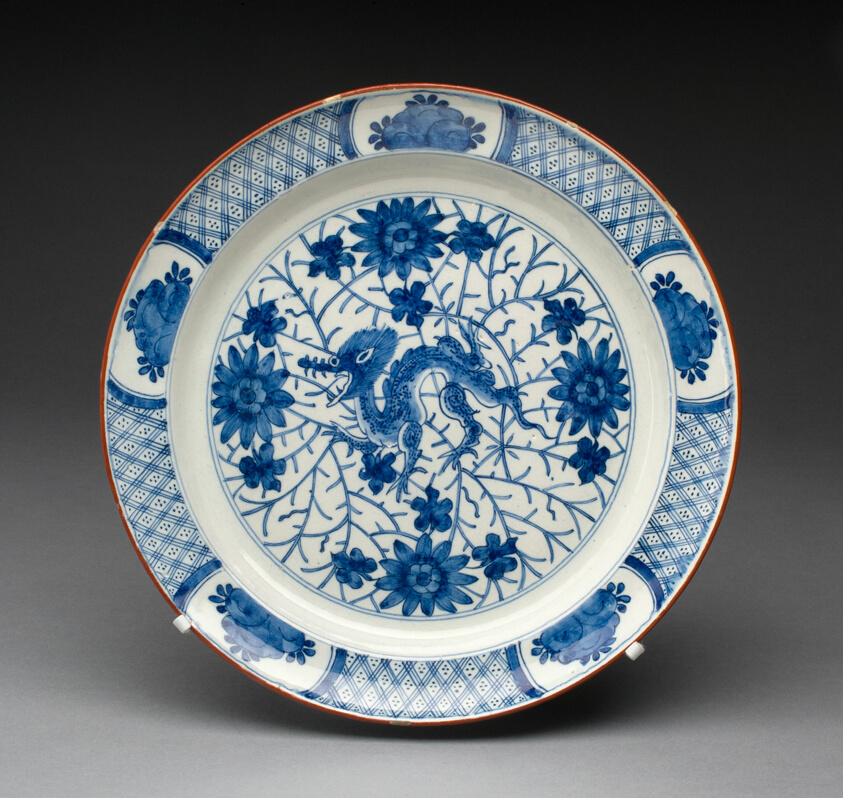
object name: Ceramics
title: Plate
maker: De Grieksche A (The Greek A) Factory; Delft, Netherlands, 1658-1811; Jacob van der Kool; Dutch, active 1722-1733; Cornelia van Willigen; Dutch, active 1733-1757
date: 1722-57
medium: Tin-glazed earthenware (Delftware)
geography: Delft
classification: plate (general, dish); dish (vessel); earthenware; ceramics; european decorative arts